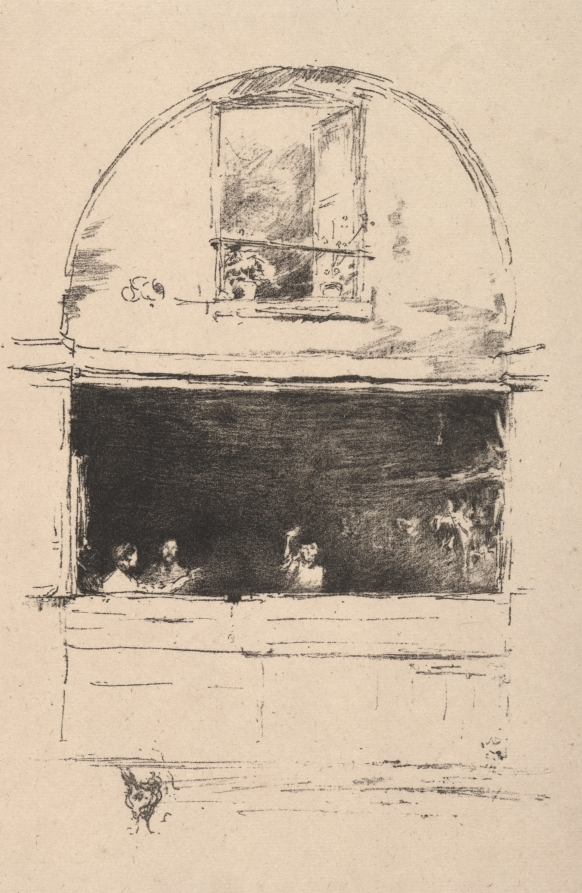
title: The Forge, Passage du Dragon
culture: America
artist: James McNeill Whistler (American, 1834–1903)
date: 1894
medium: lithograph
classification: Print